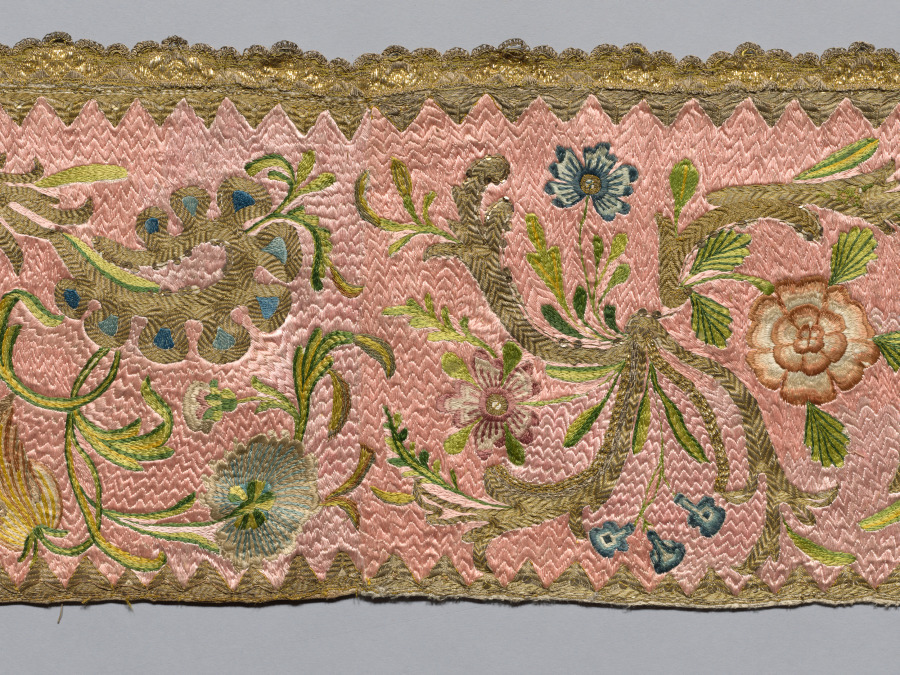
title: Embroidered Strip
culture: Italy, 18th century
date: 1700s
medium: embroidery, silk and gold thread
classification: Embroidery